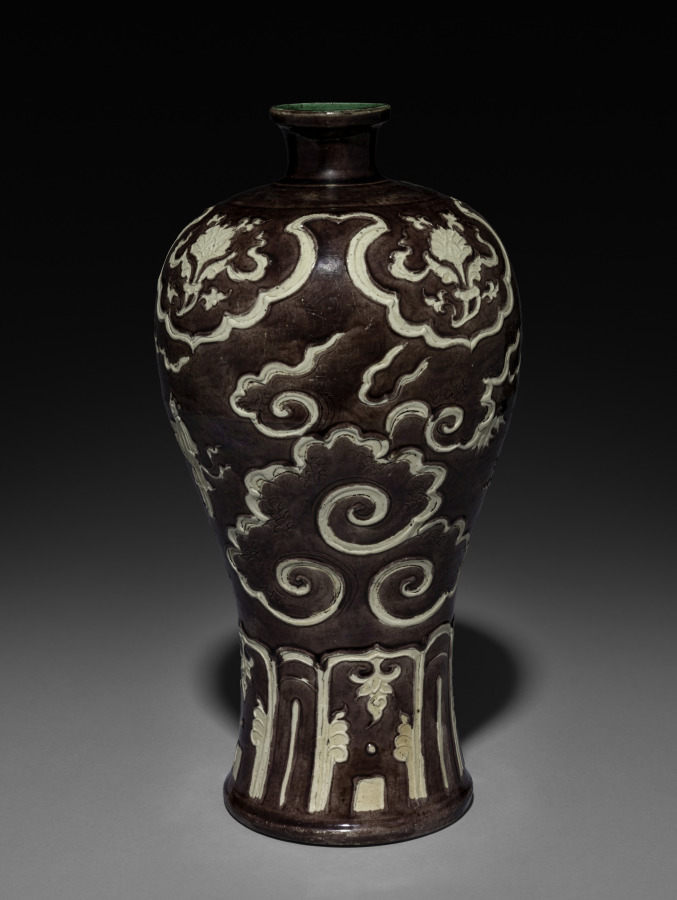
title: Vase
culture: China, Jiangxi Province, Ming dynasty (1368–1644)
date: late 1400s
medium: porcelain, Fahua ware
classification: Ceramic